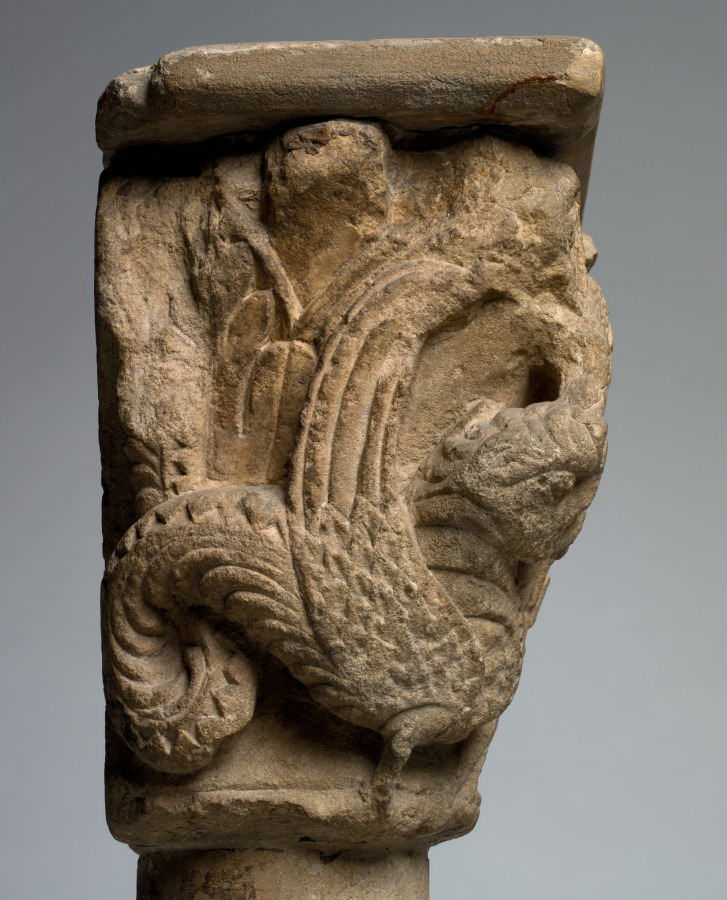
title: Engaged Capital with Birds and Dragons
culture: Western France, Bordelais or Dordogne, late 12th Century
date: late 1100s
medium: limestone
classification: Sculpture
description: Monstrous images were prevalent in the decoration of religious buildings during the Middle Ages. Such images must have impressed, perhaps even terrified, the monks and visitors who spent much of their time within the cloister or church, a place of prayer, contemplation, and reflection. Scholars have speculated how such images would have been received by the people given the ubiquity of monsters in medieval society. The carved monsters, often symbolizing vice and retribution for sin, were possibly designed to provoke a range of emotional responses including laughter, wonder, surprise, fear, and shock. This striking imagery must have had a strong impact, which in turn led Saint Bernard of Clairvaux (1090–1153), the spiritual head of the Cistercian order, to admonish their use as distracting from prayer.